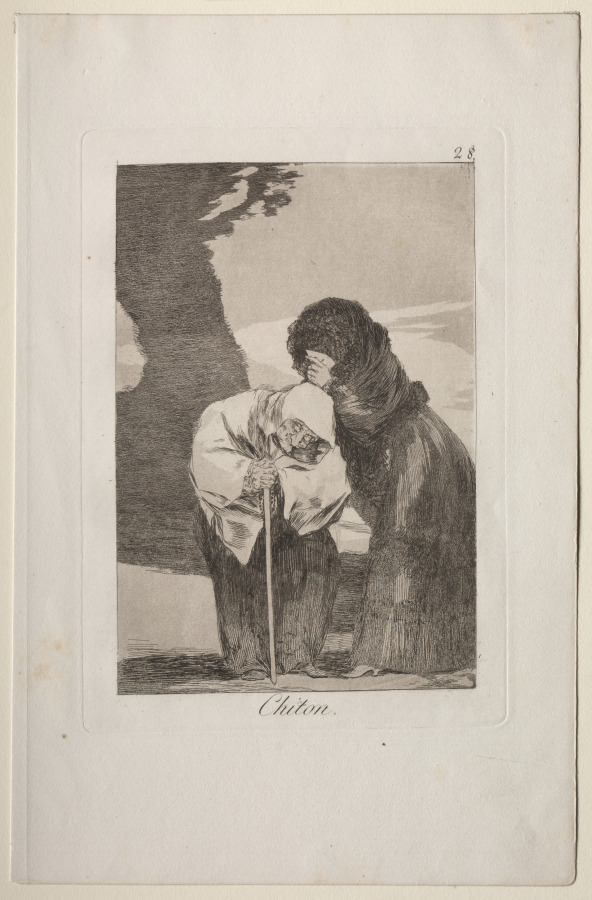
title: Hush!, Plate 28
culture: Spain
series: Los Caprichos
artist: Francisco de Goya (Spanish, 1746–1828)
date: 1799 (printed c. 1855)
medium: etching and aquatint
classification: Print